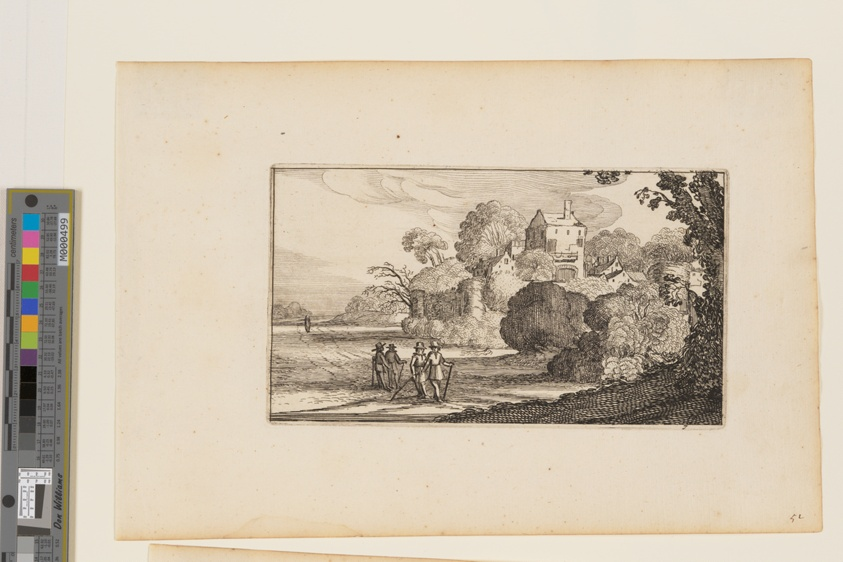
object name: Print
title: Path to Left of Walled Building Complex Amid Trees, from Twelve landscapes with Figures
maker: After Gillis van Scheyndel; Dutch, 1595–1660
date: 1624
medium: Etching on ivory laid paper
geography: Netherlands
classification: etching; paper; print; prints and drawing